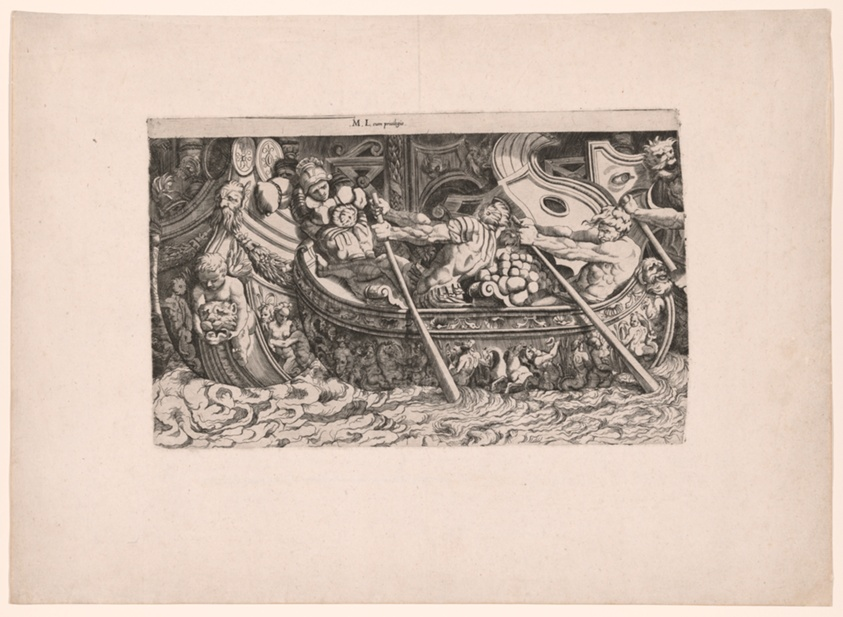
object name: Print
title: A Naval Battle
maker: Michele Lucchese (Italian, active 1534-1564); after Polidoro da Caravaggio (Italian, c. 1499- c. 1543)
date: c. 1550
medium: Engraving and etching in black on cream laid paper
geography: Italy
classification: prints and drawing; paper; etching; engraving; print